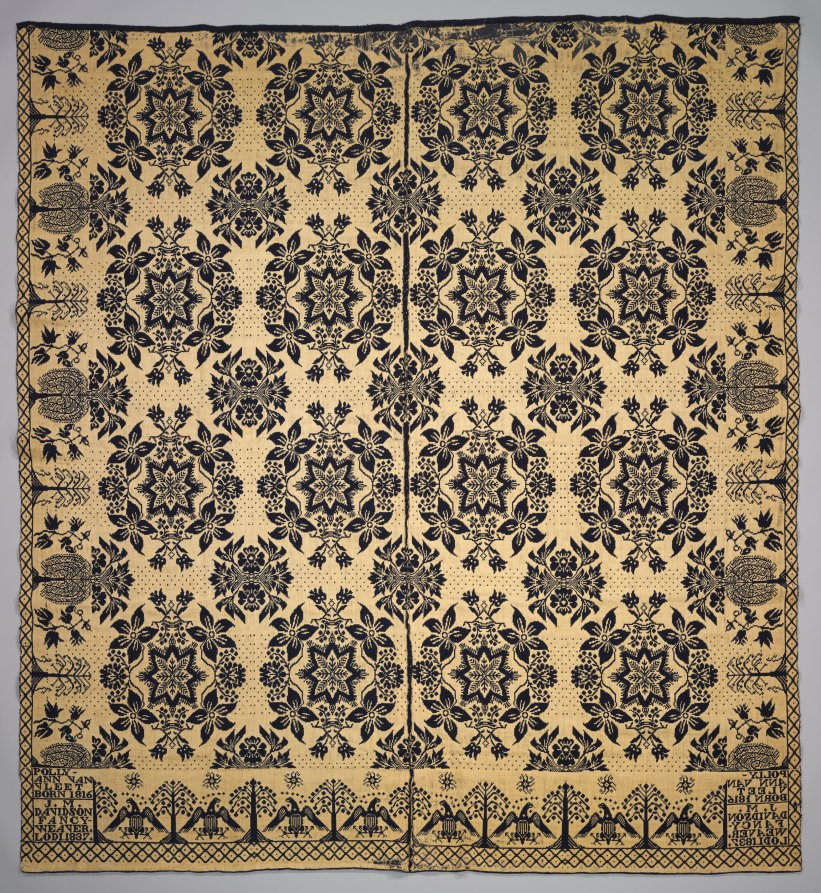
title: Coverlet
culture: America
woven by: J.M. Davidson (American)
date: 1837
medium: double weave; blue wool and white cotton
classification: Textile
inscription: Two lower corners have inwoven inscription; text in the left corner is legible, text in right corner is reversed: "POLLY - ANN VANVLEET BORN 1816 J.M. DAVIDSON FANCY - WEAVER. LODI, 1837"